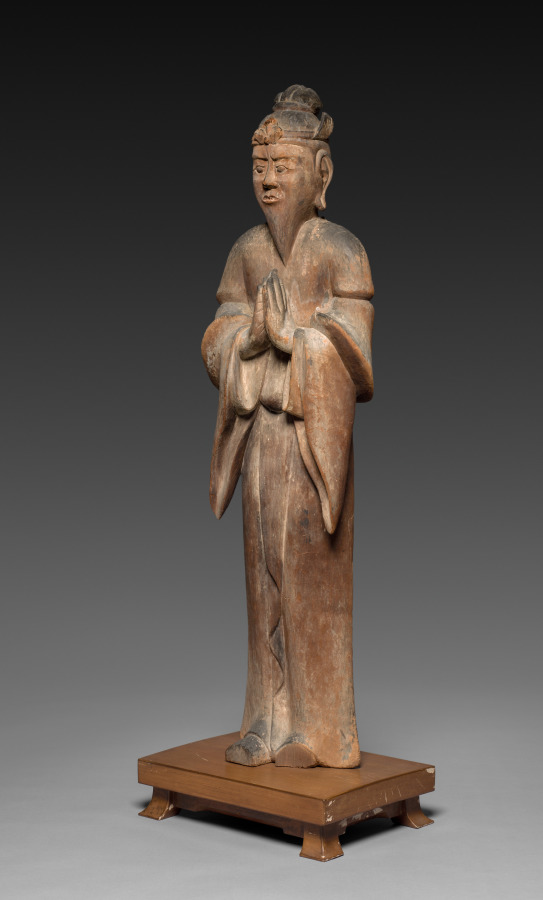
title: Deity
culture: Japan, Heian period (794–1185)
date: 1100s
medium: Magnolia wood with traces of color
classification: Sculpture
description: This unidentified sculpture represents a mature male figure with a long beard. His robes, crown-like head ornament, and hair arranged into a topknot resemble the attire and styling of members of the heavenly realm—tenbu in Japanese—of the Buddhist cosmos. The comparatively simple design, along with carving marks purposely left by the sculptor throughout the surface tend to be associated with sculptures of kami, deities venerated at shrines, or jinja.